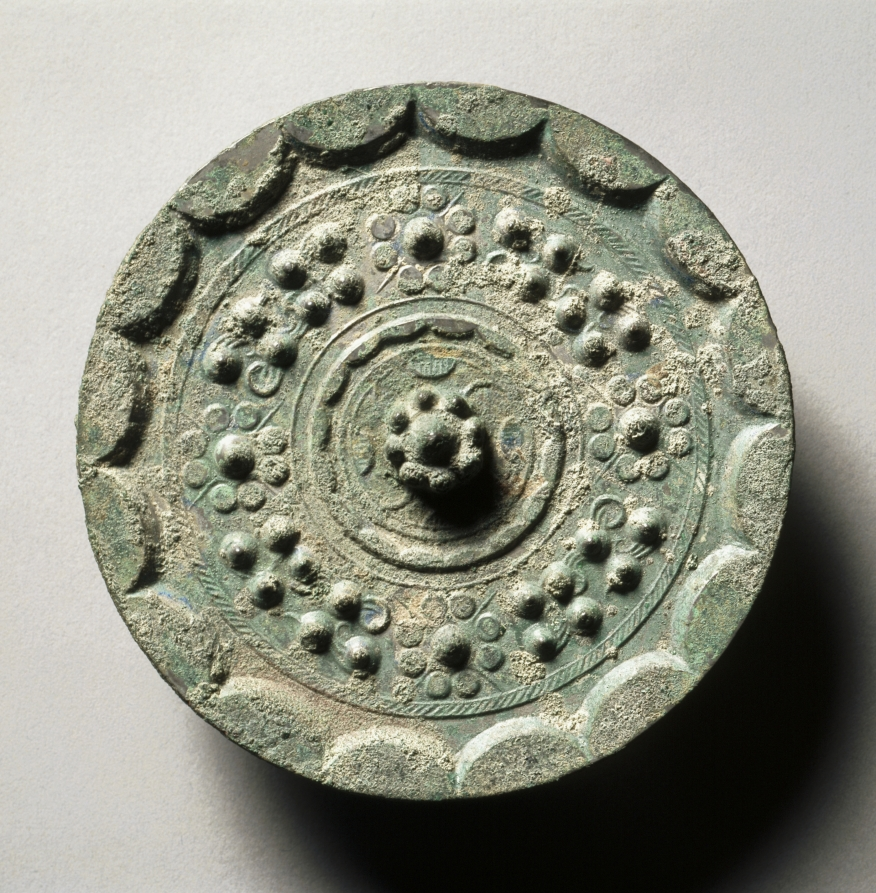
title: Mirror with Clouds and Nebulae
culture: China, Western Han dynasty (206 BCE–8 CE)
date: late 300s BCE–50 CE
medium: bronze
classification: Metalwork